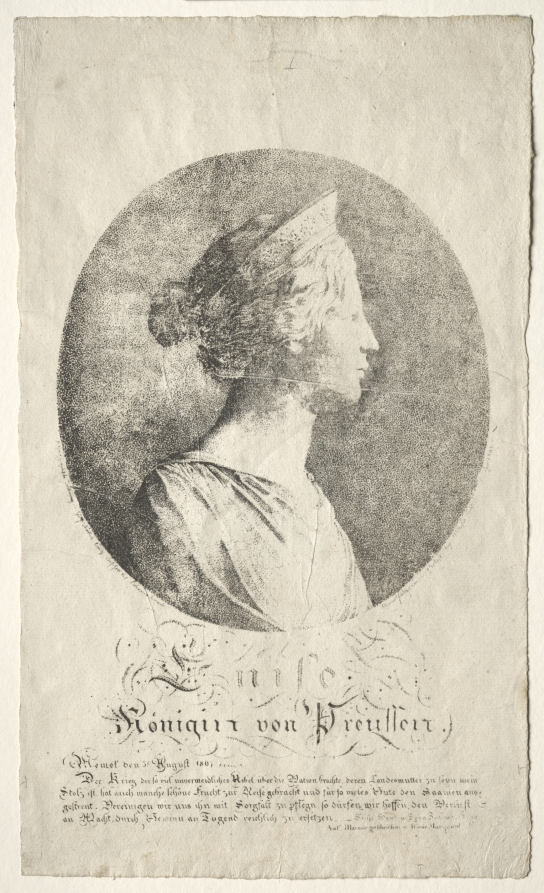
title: Queen Louise of Prussia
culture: Germany, 18th-19th century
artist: Johann Gottfried Niedlich (German, 1766–1837)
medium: lithograph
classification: Print